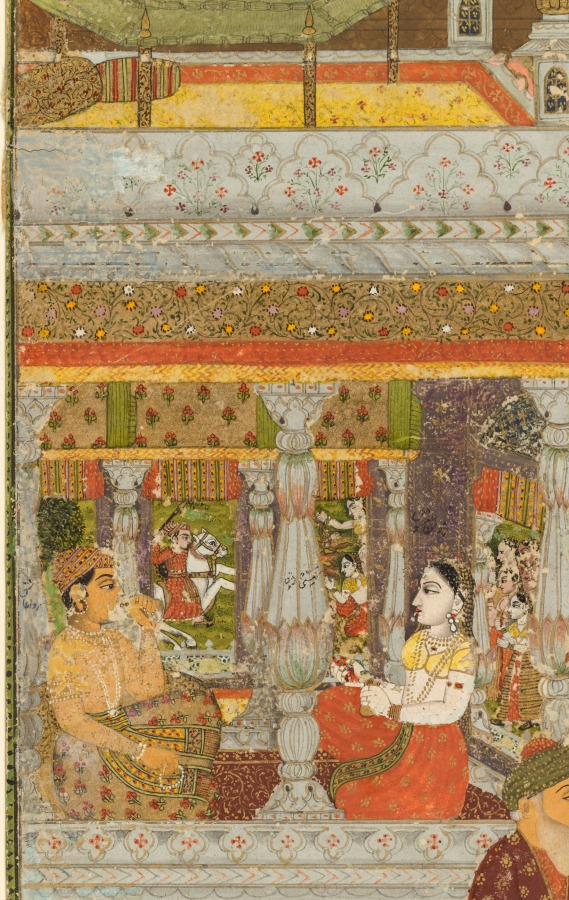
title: Lovers and beloveds: A composite of scenes from Persian, Urdu, and Sanskrit literature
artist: Chitarman II (Indian, c. 1680–с. 1750)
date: c. 1735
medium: Gum tempera and gold on paper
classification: Painting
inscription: Persian inscriptions throughout, in nasta‘liq script: Top left: The celebrated lover Ranjha; Top right, above awning: The notable ladies of the city falling into a swoon having caught sight of Joseph’s beauteous countenance; Top center, on pillar beneath canopy: The celebrated lover Vamiq; On another pillar, behind the woman’s head: The celebrated beloved ‘Azra; Upper left, on pillar: King Nala, the lover; Central figure with halo: The coming from the prison and sitting [in state] of the Lord Joseph the Prophet, with the women of the town cutting the palms of their hands and falling down unconscious; Left of center: [. . . cutting palms . . . wine cups fell from their hands . . . state of wonderment . . .]; Central pavilion at left: Sassi, the beloved the lover [Punnun]; Below central figure of Joseph: The stream of milk Shirin the beloved, weeping The death of Farhad, the lover; Lower right, in front of bearded man: Hafiz of Shiraz; Below his decanter: The stick of candy [referring to the woman with whom, according to popular lore, Hafiz was supposed to have fallen in love as a youth]; Behind the pavilion at right: Bride descending into a grave . . .; On the white railing to the left: Khwaja Bu Ali . . .; Bottom left: Queen Padmavati, the beloved, King Ratnasena, the lover; Bottom right: Majnun, the lover; On page held by Majnun: Say, “He is Allah, who is One, Allah the eternal refuge. He neither begets nor is born, Nor is there to Him any equivalent.” [Qur'an, chapter 112]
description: The figure of Joseph, identified by his halo, sits in the center near the top of this painting of heroes and heroines of ten different Persian, Urdu, and Sanskrit romances. The depicted scene occurs after Joseph has been purchased by Zulaykha in Egypt. Zulaykha, wishing to show him off to her friends and acquaintances, invites them to her home where she supplies oranges and knives. When the women see Joseph, they all are so distracted by his divine beauty that they accidentally cut their hands while peeling their oranges, but remain mesmerized by his appearance. The dramatic scene in the center is from the Persian romance of Khusrau and Shirin, in which Farhad, a stonecutter who loved Shirin, threw himself to his death from a mountaintop after hearing news of Shirin’s death, falsely sent to him from his rival Khusrau. The emaciated Majnun is in the lower right corner. Every vignette has been identified with a tiny Persian inscription.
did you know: Below the bearded poet Hafiz is the woman he loved; her name was Stick of Candy.